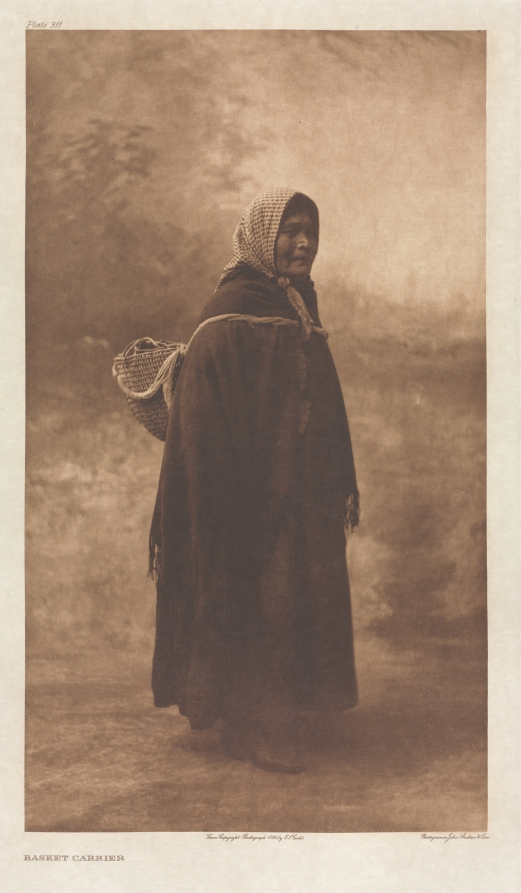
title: Portfolio IX, Plate 311: Basket Carrier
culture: America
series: The North American Indian: being a series of Portfolios picturing and describing the Indians of the United States, the Dominion of Canada, and Alaska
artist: Edward S. Curtis (American, 1868–1952)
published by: The University Press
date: 1899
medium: photogravure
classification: Portfolio